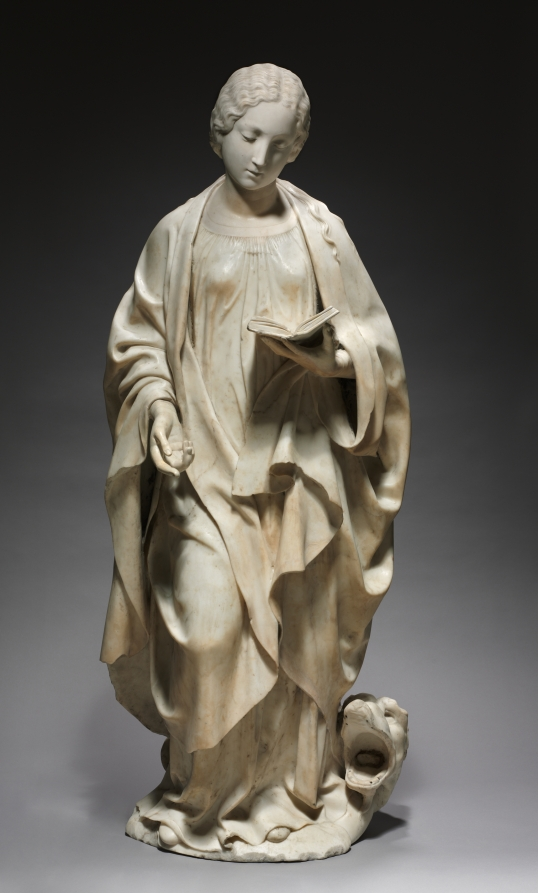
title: Saint Margaret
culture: Italy, Sicily, Palermo, 16th century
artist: Antonello Gaggini (Italian, 1478–1536)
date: c. 1520–1530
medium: marble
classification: Sculpture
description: Gaggini was a member of a large family of sculptors whose Palermo workshop supplied monumental religious sculptures for the cathedrals of Palermo and Messina in Sicily and Montelione in Calabria. After 1507 Antonello himself worked for 15 years to produce marble sculptures for Palermo Cathedral. This figure of the legendary virgin martyr, Saint Margaret, was probably commissioned for one of these ecclesiastical foundations, possibly the chancel of Palermo Cathedral. The saint is shown reading from a book of hours (a sign of her piety) and trampling upon a dragon, the symbol of Satan. The dragon became the attribute by which she is recognized in sacred art.